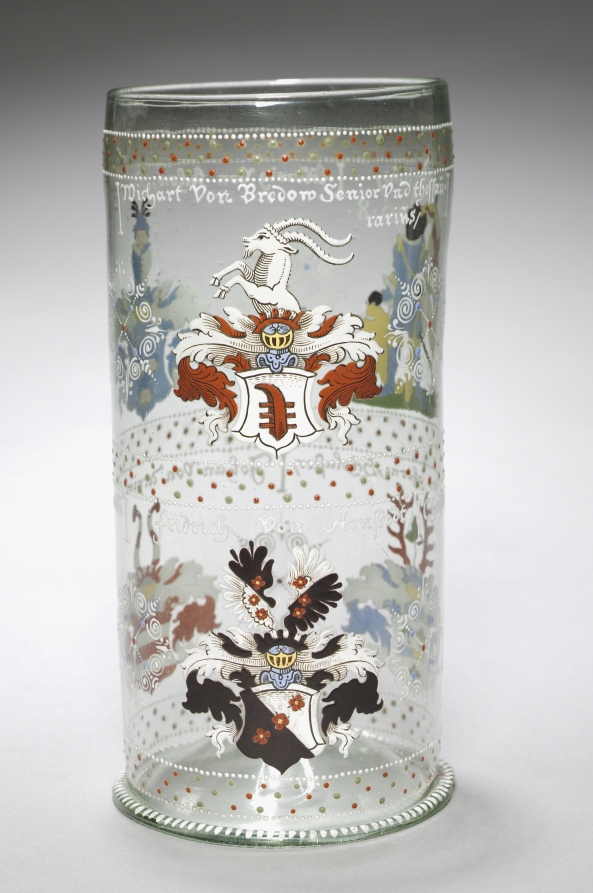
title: Beaker (Humpen)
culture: Germany, probably Bohemia, 16th century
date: 1568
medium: enameled glass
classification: Glass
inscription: LUDWIG VON LOCHOW, DOMDECHANT (dean of a cathedral); JOHAN VON ARNIM, CELLARIUS (a steward of a religious order); CHRISTOFF VON GHORNE, SCHOLASTER (a scholastic).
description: This humpen once belonged to the Chapter of Magdeburg Cathedral. On the upper register is the figure of St. Mauritius, patron saint of Magdeburg and the inscription S. Mauritius, 1568. Armorial shields are accompanied by names of members of the cathedral chapter.